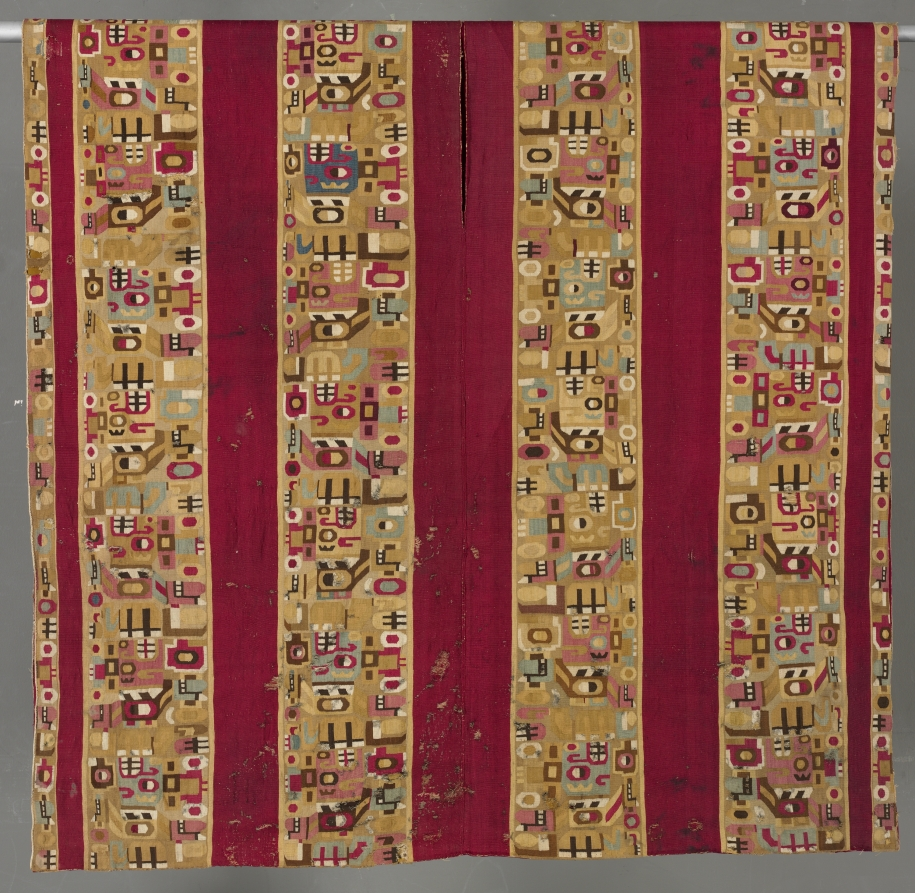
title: Tunic with Sacrificer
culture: South America, Peru, Central Andes, Middle Horizon, Wari people, 7th-11th century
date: 600–1000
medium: camelid-fiber, cotton; tapestry weave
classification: Textile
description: An extremely abstract supernatural sacrifice repeats in different colors and orientations across the body of this tunic, which was shortened on one side in antiquity. Look for the toothy black-and-white mouth in the sacrificer's upward-gazing head; other facial features include a button nose and a vertically divided eye. The figure holds the L-shaped haft of an axe behind its back and, at the front of its body, a short staff with a severed, upside-down human head on the top.